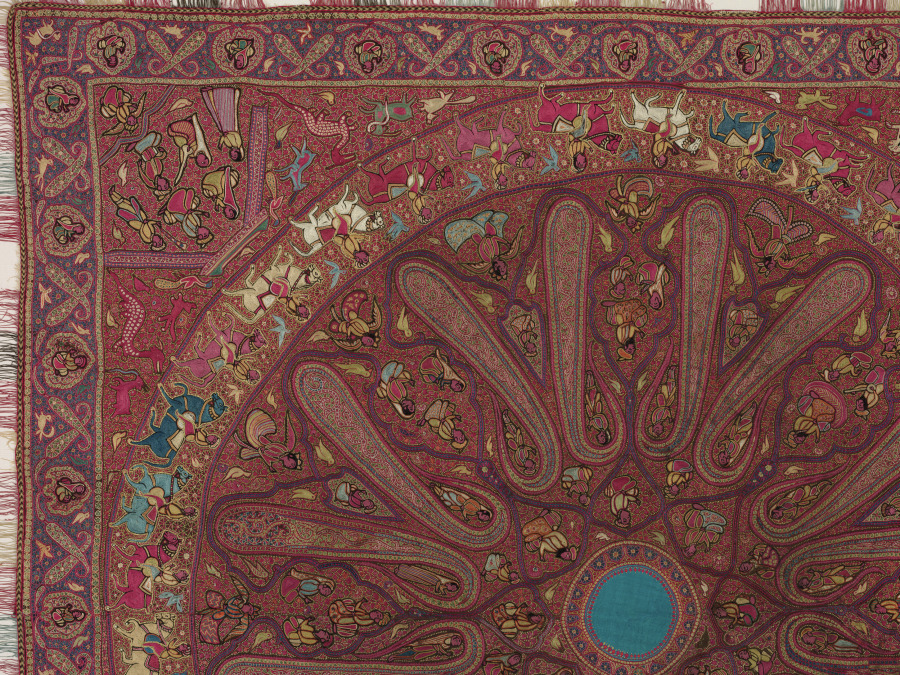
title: Square Shawl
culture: India, Kashmir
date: c. 1850–70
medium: Silk and silver filé, wool: chain stitch embroidery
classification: Embroidery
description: By the 1800s, the Himalayan foothill region of Kashmir was renowned for distinctive embroideries, and Kashmiri shawls were coveted by women throughout the British Empire. The center of this square shawl is in the form of an eight-petaled lotus, a symbol for the sun, and around it are the elongated forms of slender cypress trees, which became the inspiration for paisley. Every space is populated with figures: seated, standing, male, female, or playing musical instruments. Others are winged heavenly figures called peri. Birds are the only animals in these central spaces, suggesting a heavenly realm. In the next concentric ring riders in an equestrian procession alternate with flying birds. In the spandrels, the triangular sections between the circle and the square, are gatherings under a tent with animals. Some local Himalayan animals can be identified, such as the spotted snow leopard and the snake-eating markhor goat.